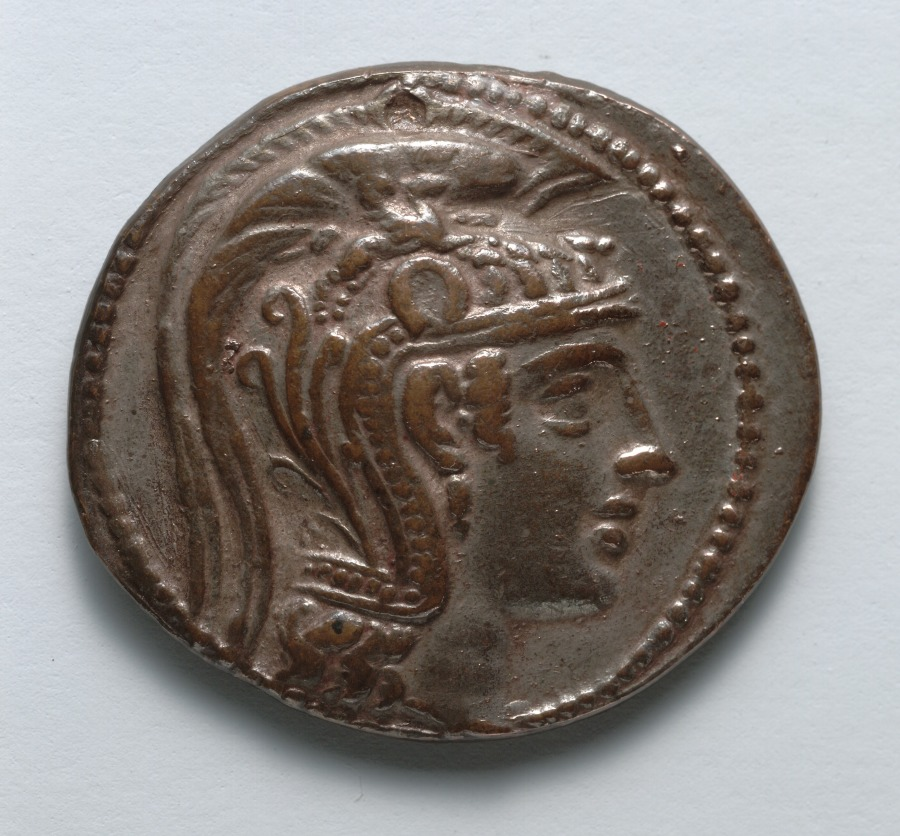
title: Electrotype Replica of Tetradrachm: Head of Athena (obverse); Owl (reverse)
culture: Greece (?)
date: 1838–1916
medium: Silver-plated copper alloy (?)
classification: Coins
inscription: EYM/APEI/ΔΗΣ/ΑΛΚΙ/ΔΑΜ/ΔΙΟΝ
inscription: ΑΘΕ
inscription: ΜΕ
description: With a green tint betraying its copper content, this coin is an electrotype replica created more than a century ago. It precisely replicates the form of a 2nd-century BC original. Retaining the basic scheme of Athena and owl from earlier Athenian coinage, these “New Style” tetradrachms—as scholars call them—give the goddess a more naturalistic appearance and add an amphora, olive wreath, and magistrate names to the reverse.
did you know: This silver-plated replica weighs about 12 grams, nearly 30% less than a pure silver tetradrachm.